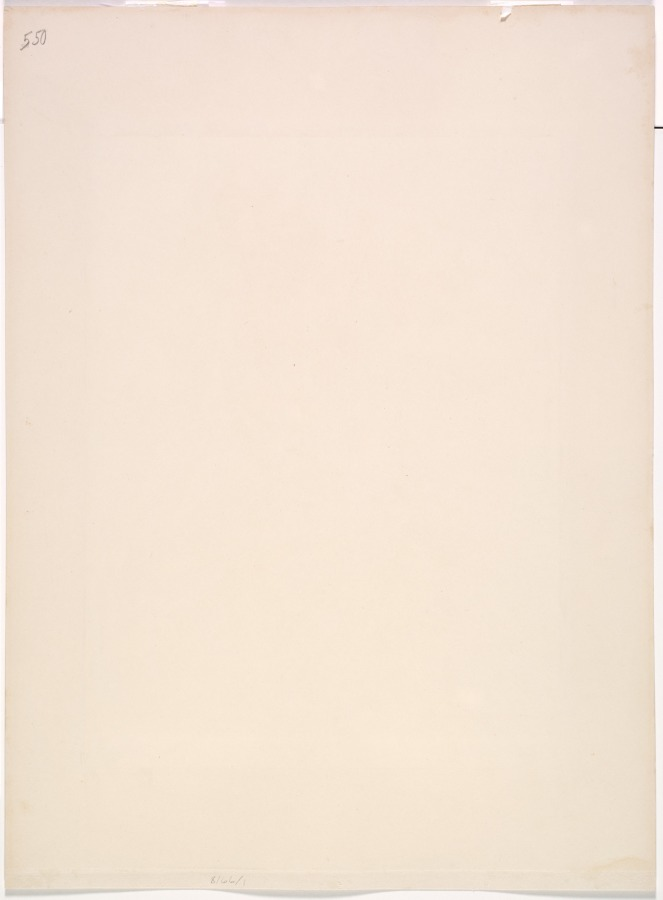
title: Untitled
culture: England, 19th century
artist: possibly by Skeen & Co. (British, active 1860–1920)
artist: possibly by Charles T. Scowen (British)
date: 1880s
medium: Albumen print, gold-toned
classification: Photograph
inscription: Scribbled in pencil on recto of mount: "5 [possibly 4, indecipherable handwriting]" Written in pencil on verso of mount: "550" Written in pencil on verso of mat: "W.L.H. Skeen (1860-1900)/CEYLON, 1880s/albumen print (gold toned)/1400 (Euros)/260 x 205 mm"